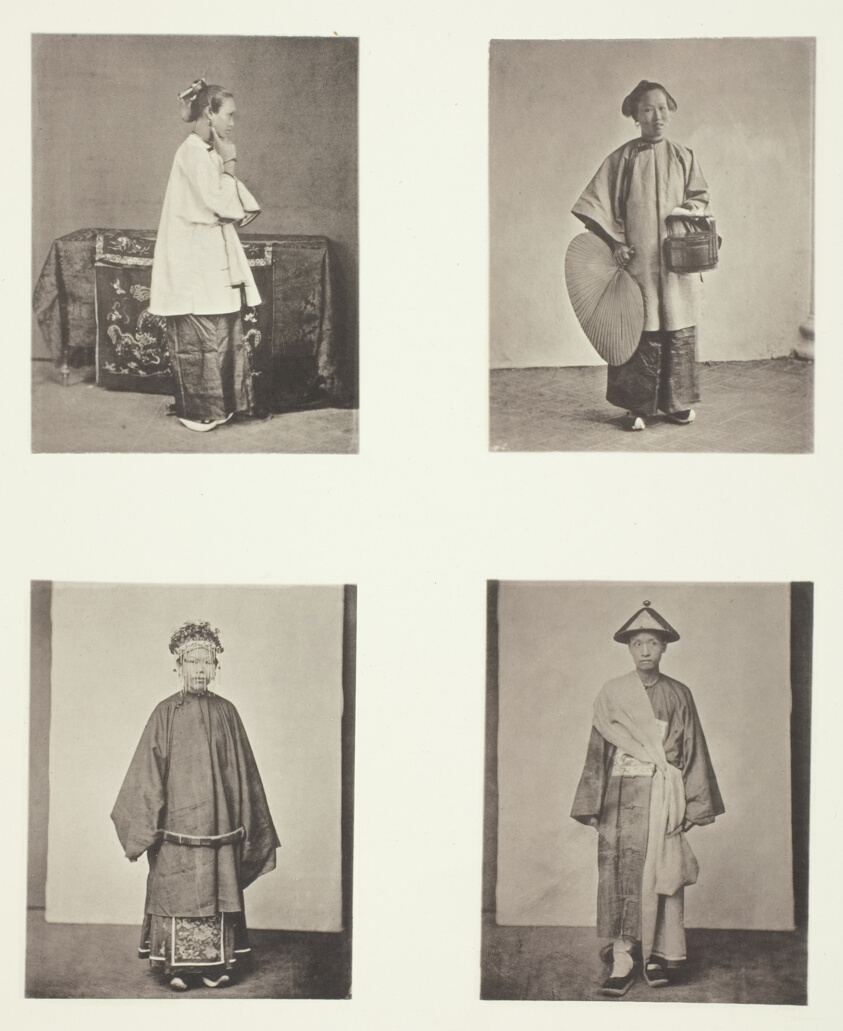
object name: Photograph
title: A Canton Lady; The Lady's Maid; A Bride and Bridegroom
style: 19th century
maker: John Thomson (Scottish, 1837–1921)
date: c. 1868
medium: Collotype, pl. XV from the album "Illustrations of China and its People, Volume I" (1873)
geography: Scotland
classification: photography; photograph